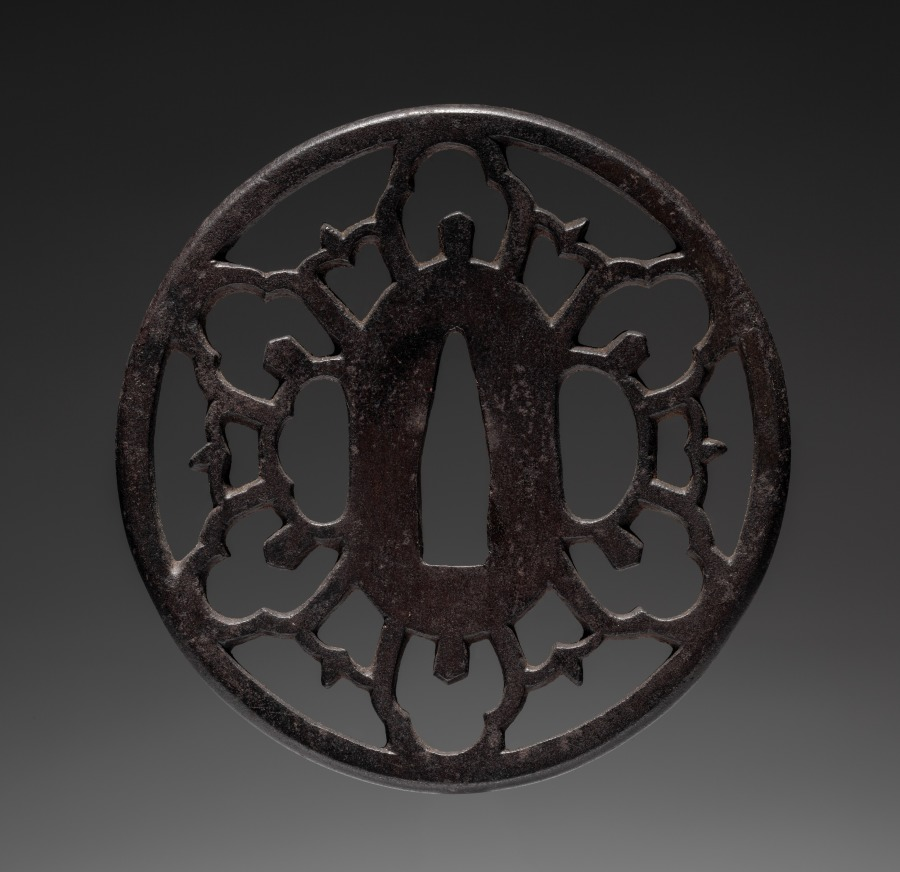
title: Sword Guard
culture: Japan, Edo period (1615–1868)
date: 1615–1868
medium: iron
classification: Arms and Armor